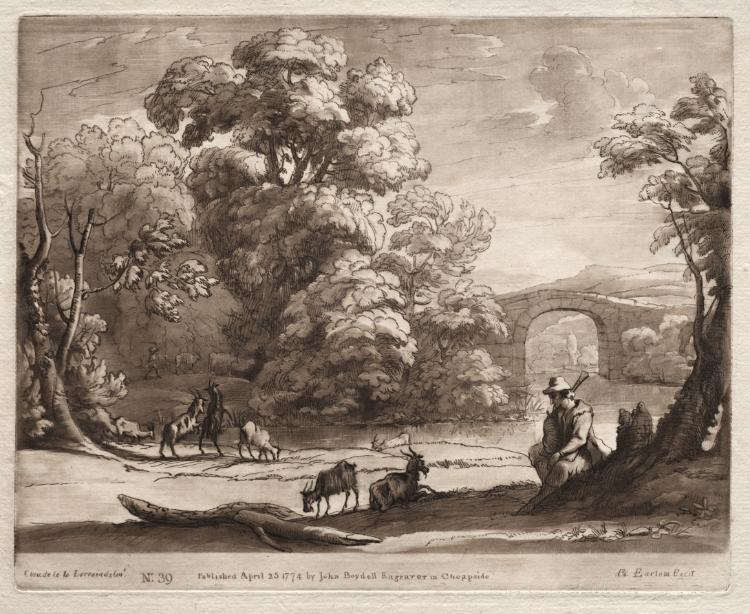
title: Liber Veritatis: No. 39, A Landscape with Herdsman Playing a Bagpipe and Goats Browsing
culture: England, 18th century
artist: Richard Earlom (British, 1743–1822)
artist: after Claude Lorrain (French, 1604–1682)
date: 1774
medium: etching and mezzotint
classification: Print